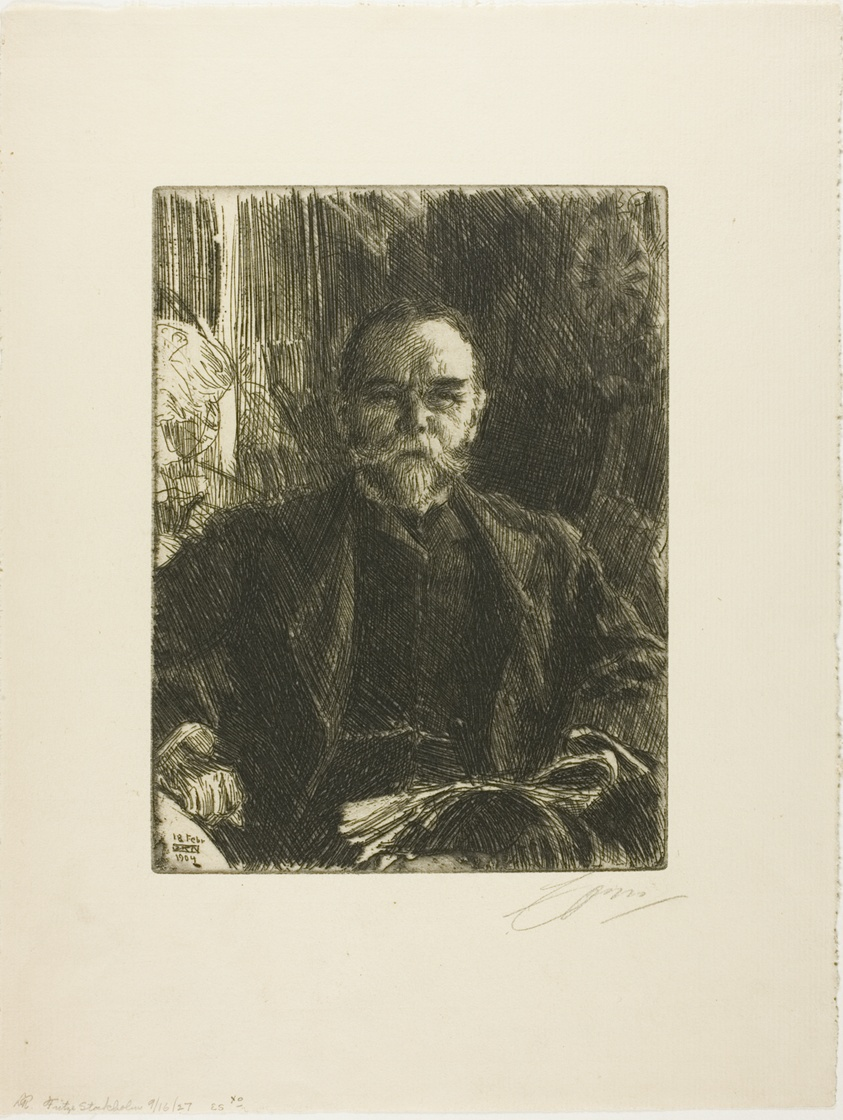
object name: Print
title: John Hay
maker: Anders Zorn (Swedish, 1860-1920)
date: 1904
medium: Etching on ivory laid paper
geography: Sweden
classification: etching; print; prints and drawing